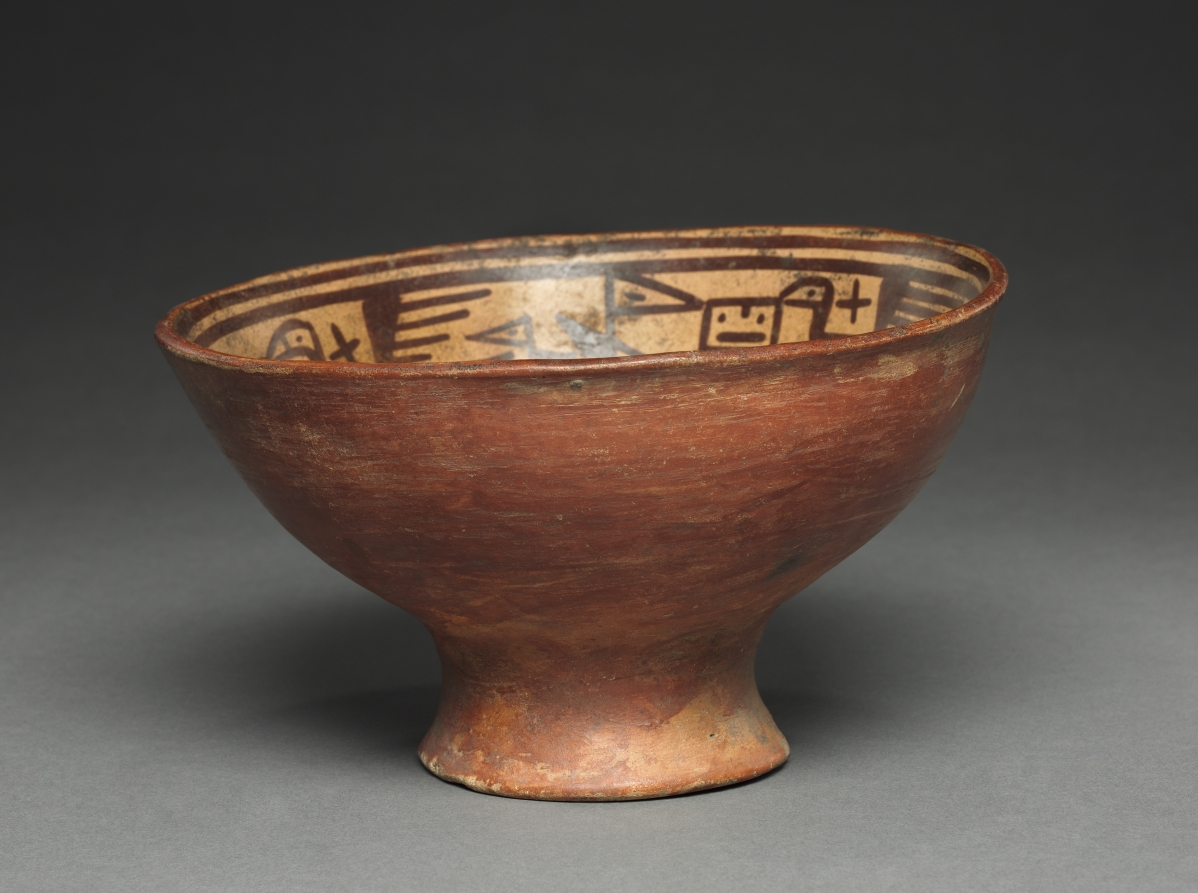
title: Bowl with Humans and Birds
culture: Colombia, Highland Nariño region,Tuza style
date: c. 1250–1550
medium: earthenware with colored slips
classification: Ceramic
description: In the Nariño region of southwestern Colombia, the dead were buried in shaft tombs, the most elaborate up to sixty feet deep and furnished with offerings such as these bowls. Colombian ceramics are not much studied and little can be said about their imagery, which reveals a keen interest in geometric abstraction. Depicted here are a row of figures with thatch-roofed huts, humans attacked by birds, and spiders.